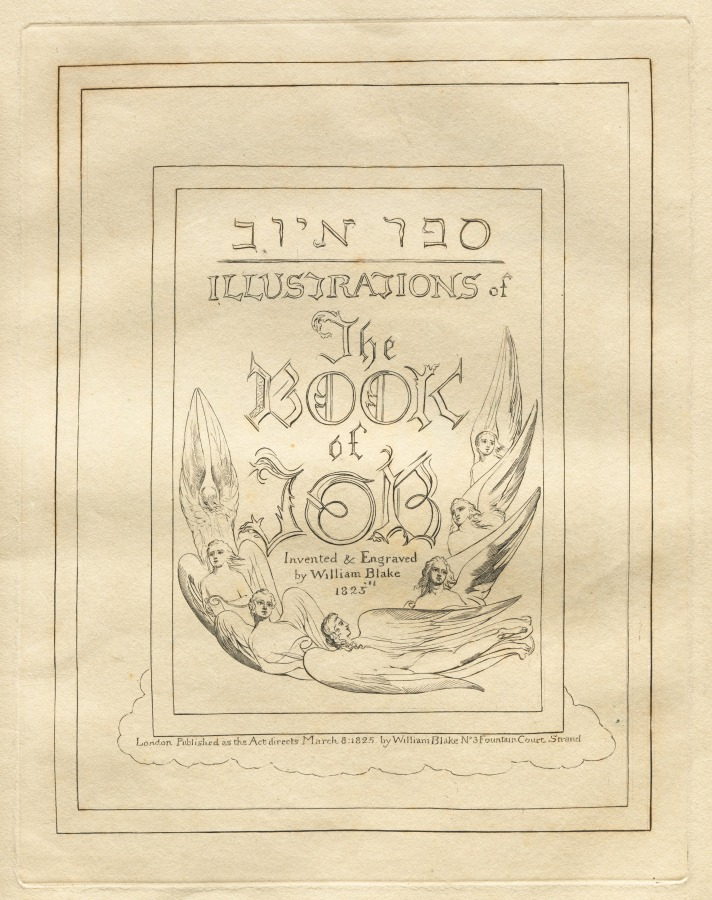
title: The Book of Job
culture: England, 19th century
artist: William Blake (British, 1757–1827)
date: 1825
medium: engraving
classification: Print